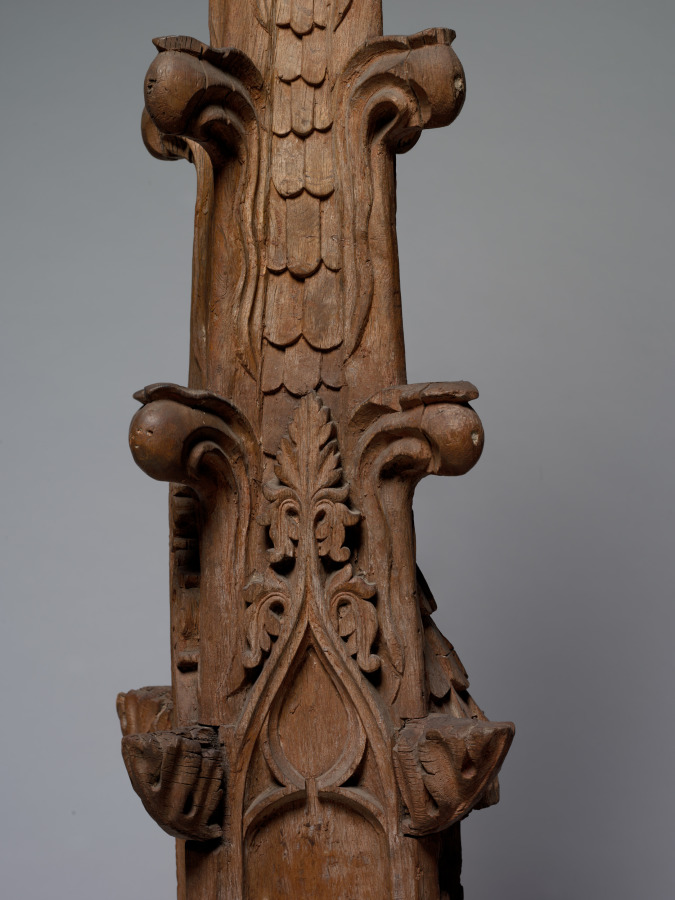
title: Pinnacle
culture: France, 15th century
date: 1400s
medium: oak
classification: Furniture and woodwork